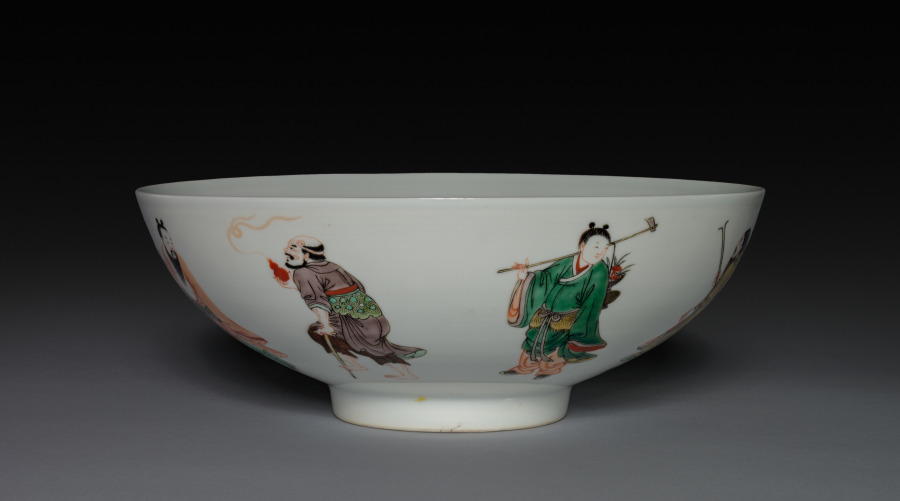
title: Bowl with Eight Immortals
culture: China, Jiangxi province, Jingdezhen kilns, Qing dynasty (1644-1911), Kangxi reign (1662-1722)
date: 1662–1722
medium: porcelain with famille verte overglaze enamel decoration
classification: Ceramic